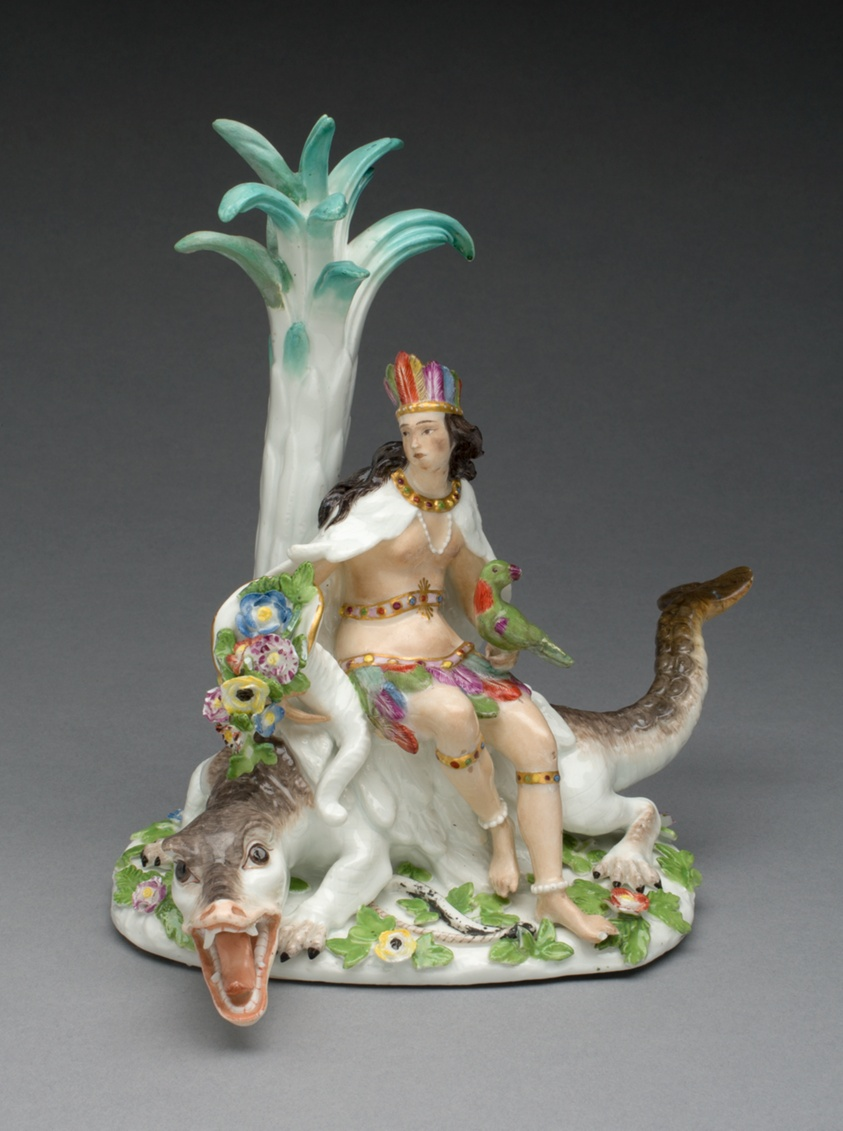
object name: Ceramics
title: Allegorical Figure Representing America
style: Rococo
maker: Meissen Porcelain Factory; Germany, founded 1710; Modeled by Johann Joachim Kändler; German, 1706-1775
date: 1746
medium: Hard-paste porcelain, polychrome enamels, and gilding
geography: Meissen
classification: sculpture; ceramics; porcelain; european decorative arts